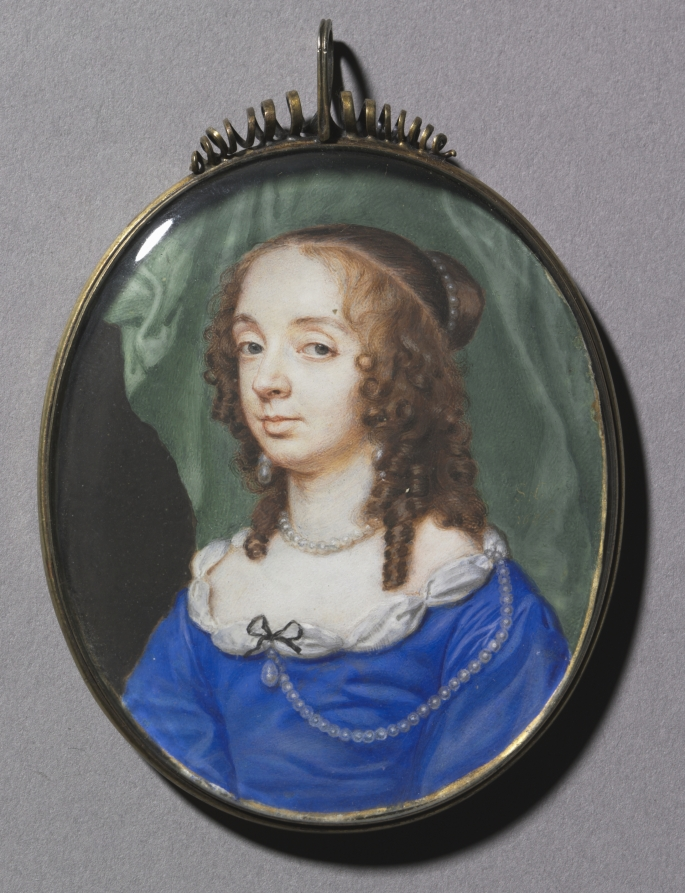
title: Portrait of a Woman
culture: England, 17th century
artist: Samuel Cooper (British, 1608/09–1672)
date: 1646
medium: watercolor on vellum with gold border in a silver gilt frame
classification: Portrait Miniature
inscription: signed right: S.C. / 1646.